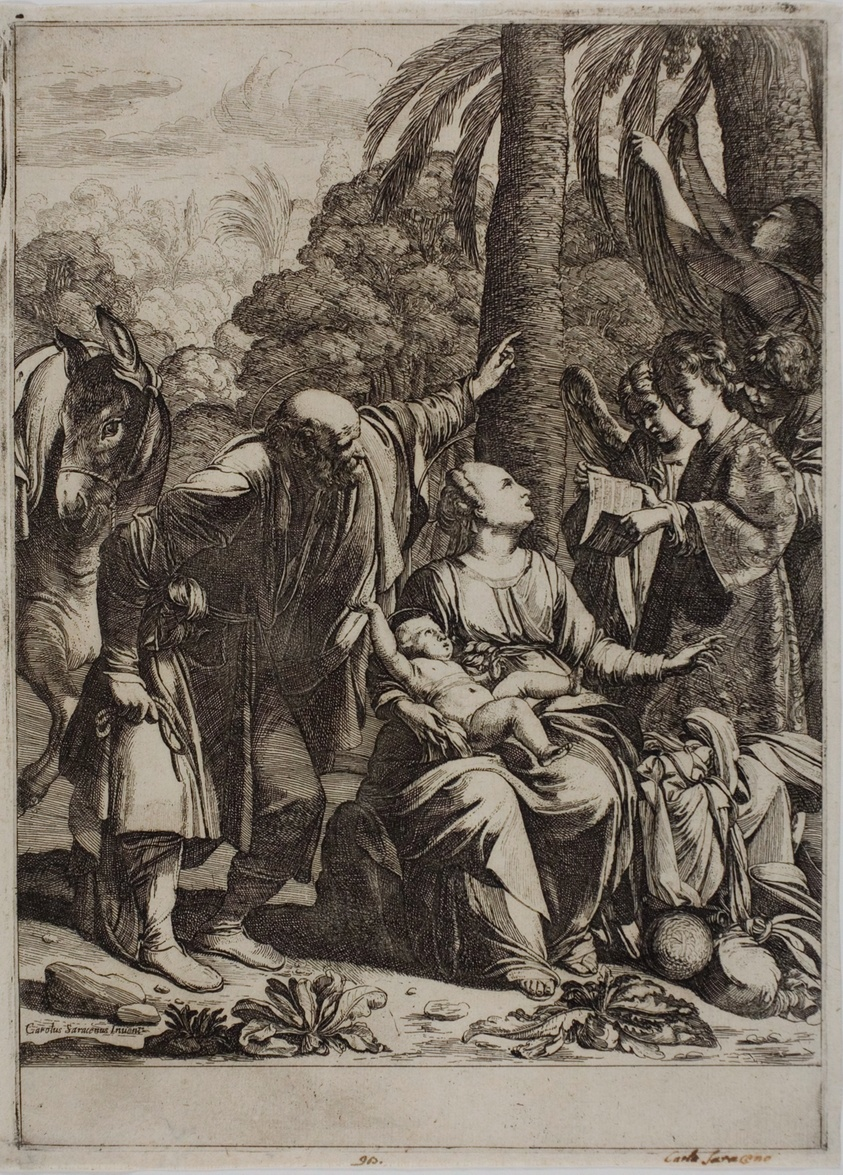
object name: Print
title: Rest on the Flight into Egypt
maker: Jean Le Clerc (French, 1585/87-1633); after Carlo Saraceni (Italian, c.1579-1620)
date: 1620/30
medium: Etching on cream laid paper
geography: France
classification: etching; print; prints and drawing